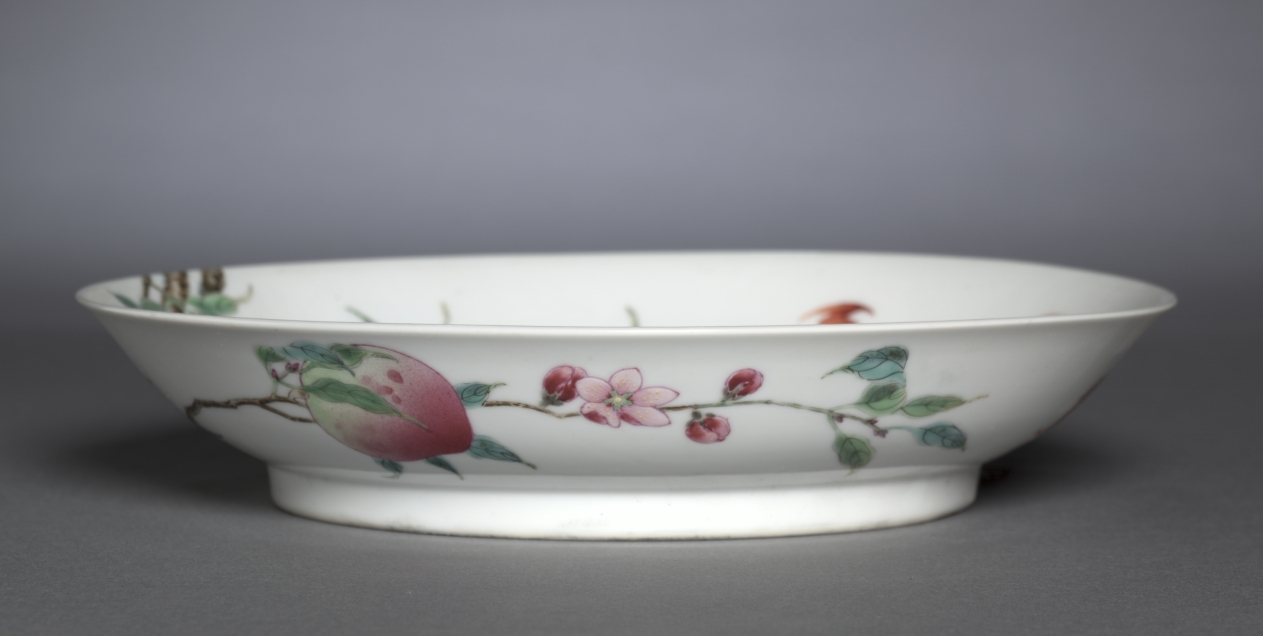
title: Dish with Bats and Peaches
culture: China, Jiangxi province, Jingdezhen kilns, Qing dynasty (1644-1911), Yongzheng mark and reign (1722-35)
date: 1723–35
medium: porcelain with famille rose overglaze enamel decoration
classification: Ceramic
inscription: 大清雍正年制